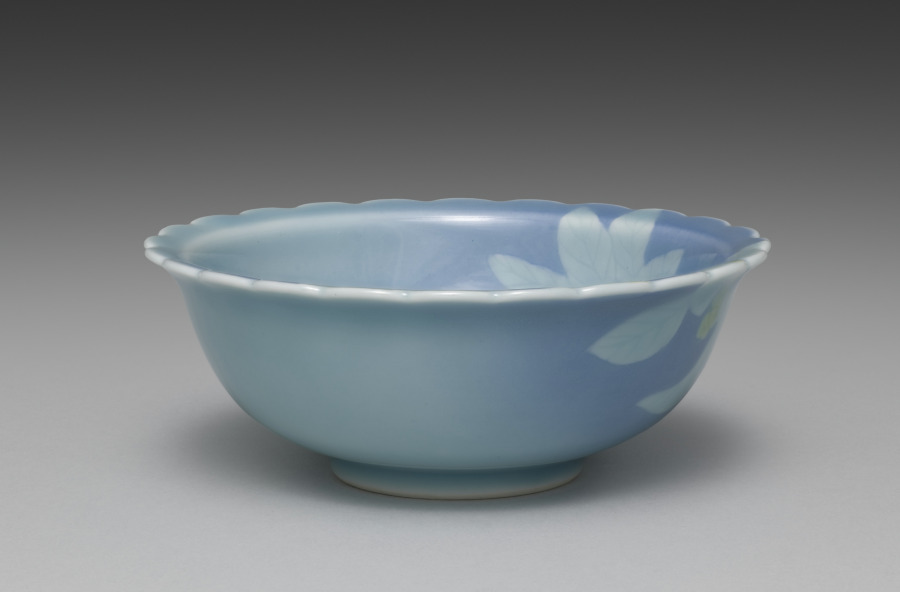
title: Dish from Dishes with Flowers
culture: Japan, Taishō period (1912–26) or Shōwa period (1926–89)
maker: Seifū Yohei IV (Japanese, 1872–1951)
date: 1914–46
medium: One from a set of five dishes; porcelain with underglaze yellow and blue glaze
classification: Ceramic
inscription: 清風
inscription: 清風造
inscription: 成山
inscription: 清風盧人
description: One can imagine a cool summer breeze when looking at this set of dishes, each shaped with a crenulated mouth and glazed with blue. Around the rim and into the basin, the bowls have low-relief designs of flowers with underglaze yellow petals; their leaves and stems show white through the glaze. On each dish, the design continues over the rim onto one side.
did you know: Seifū Yohei IV’s dishes with flowers feature underglaze yellow.